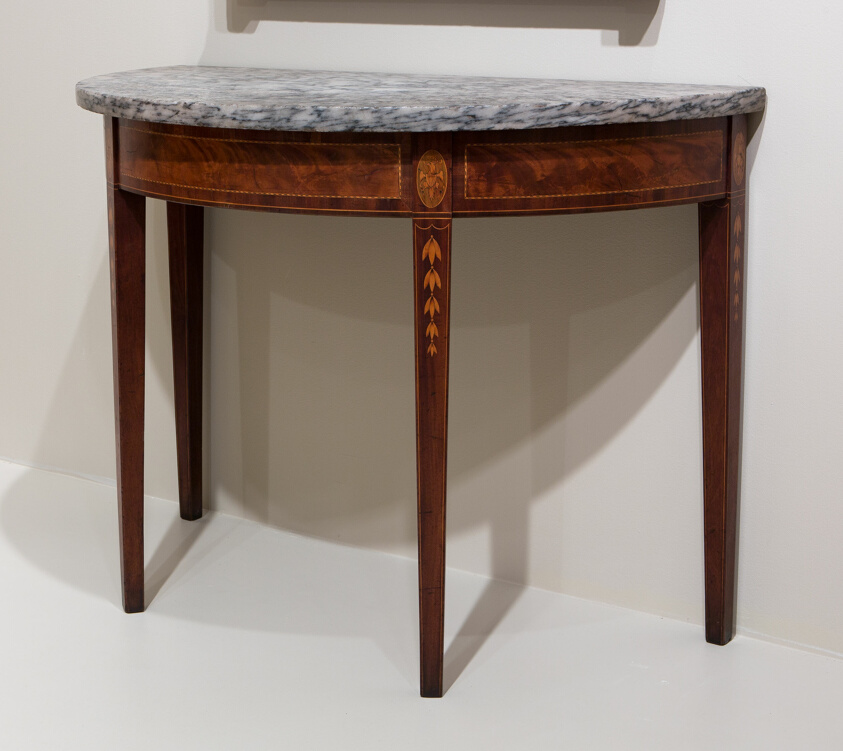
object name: Furniture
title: Pier Table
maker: Artist unknown (American, 18th–19th century); Baltimore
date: 1790–1810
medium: Mahogany, yellow poplar, white oak, yellow pine, and marble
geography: Baltimore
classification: table; furniture; american decorative arts; american arts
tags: furniture